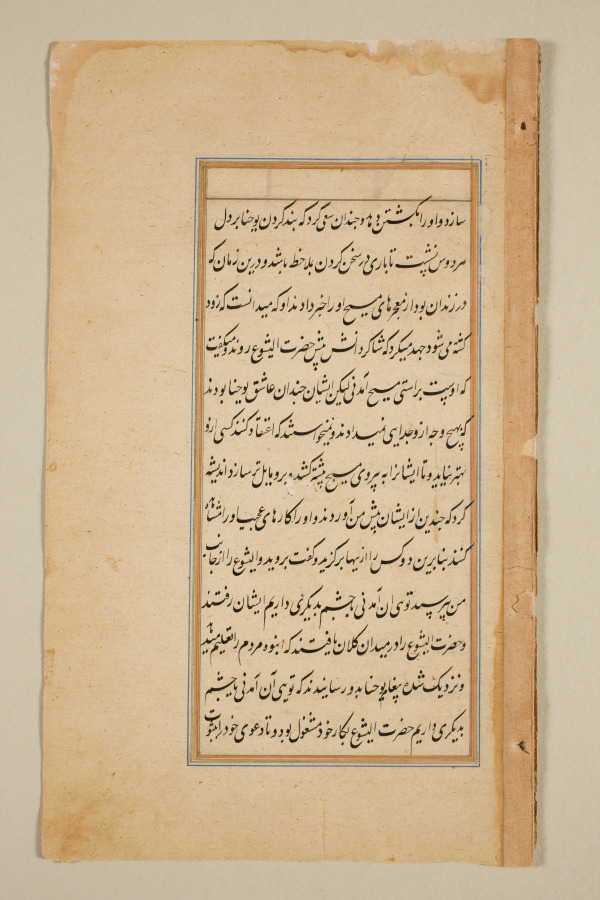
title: Text page from a Mirror of Holiness (Mir’at al-quds) of Father Jerome Xavier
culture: Mughal India, Allahabad, made for Prince Salim (1569–1627)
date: 1602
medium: Ink and gold on paper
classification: Manuscript